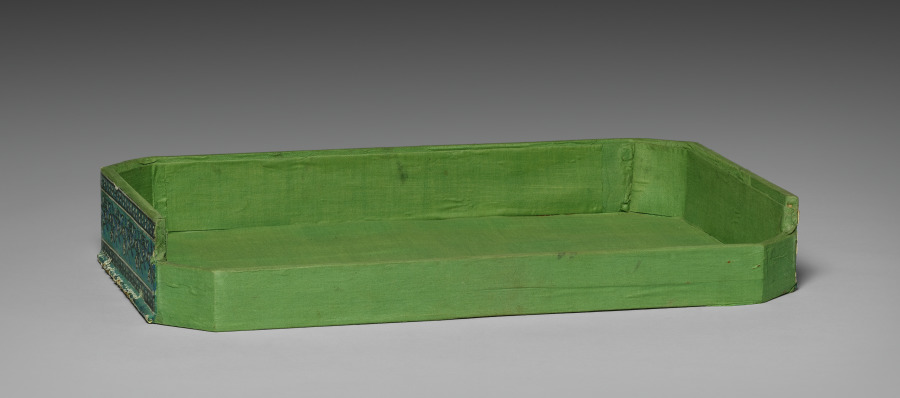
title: Chest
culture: Italy, Venice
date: 1700s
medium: leather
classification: Miscellaneous